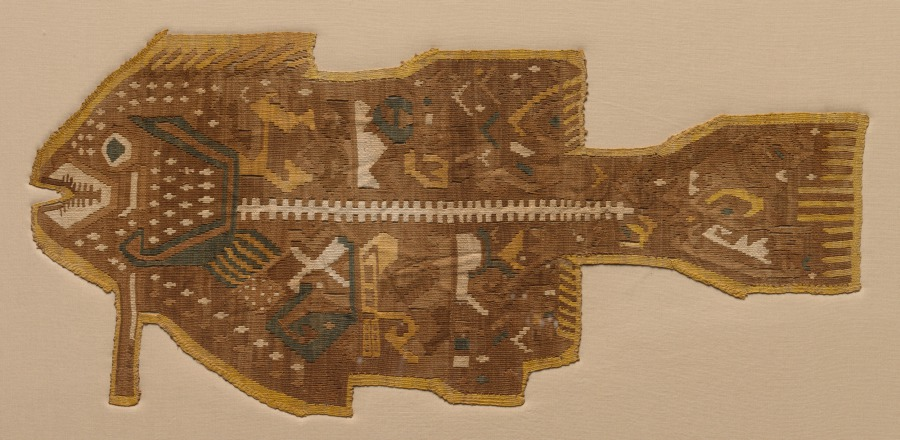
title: Fish-Shaped Applique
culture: Central Andes, Central Coast, Ychsma (Pachacamac) people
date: 1400–1532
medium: cotton and camelid fiber, tapestry weave with areas of eccentric weft floats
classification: Textile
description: This fish-shaped textile was originally stitched with others like it to a mantle, a shawl-like garment that was a staple of Andean clothing. Its partial “X-ray view,” which emphasizes the bony spine, is unique to the style of the Ychsma (yeach-mah), who lived on Peru’s central coast. In addition to referencing sources of food, marine subjects may also carry religious associations, as some coastal peoples of the period regarded the sea as a deity.